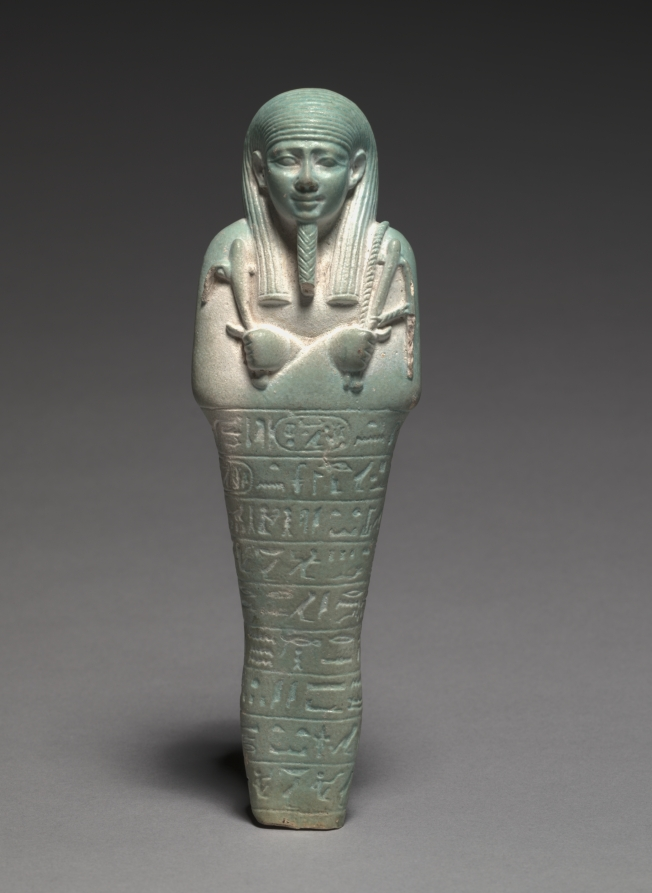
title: Shawabty of Nectanebo II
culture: Egypt, Late period (715–332 BCE), Dynasty 30, reign of Nectanebo II (358–340 BCE)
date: 360–342 BCE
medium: pale turquoise faience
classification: Funerary Equipment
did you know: Nectanebo II is the last Egyptian native to be pharaoh. This small statuette has idealized facial features and bears an inscription on the lower half that contains a wish for the afterlife.